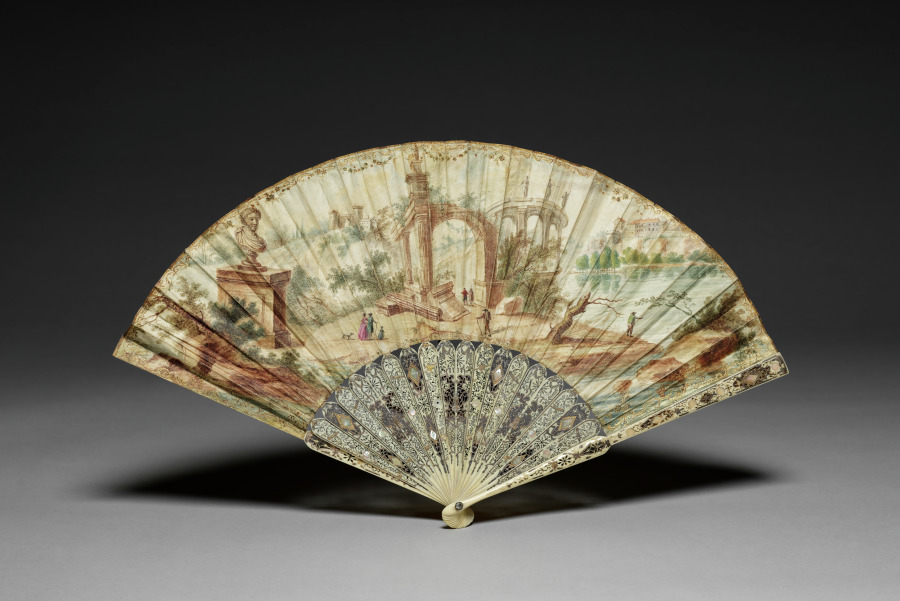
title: Folding Fan: Landscape with Ancient Ruins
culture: France(?)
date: c. 1790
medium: leaf: gouache on skin; frame: pierced ivory with metal and mother-of-pearl inlays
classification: Miscellaneous